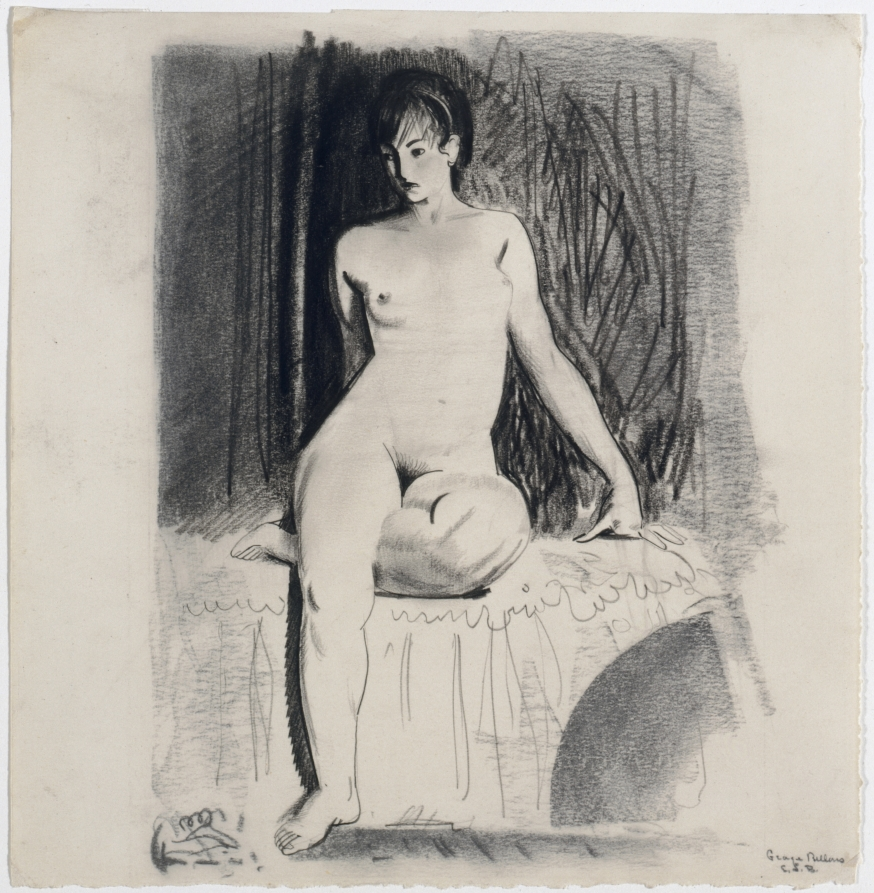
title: Seated Female Nude (Emma Story Bellows)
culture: America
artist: George Bellows (American, 1882–1925)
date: after 1910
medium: black lithographic crayon with traces of stylus (above head)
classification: Drawing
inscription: signed, lower right, in graphite: George Bellows / E. S. B.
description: Bellows achieved fame as a young man for his powerful boxing scenes and images of urban life, but he also produced sensitive drawings and paintings of women. Bellows married Emma Story in 1910.